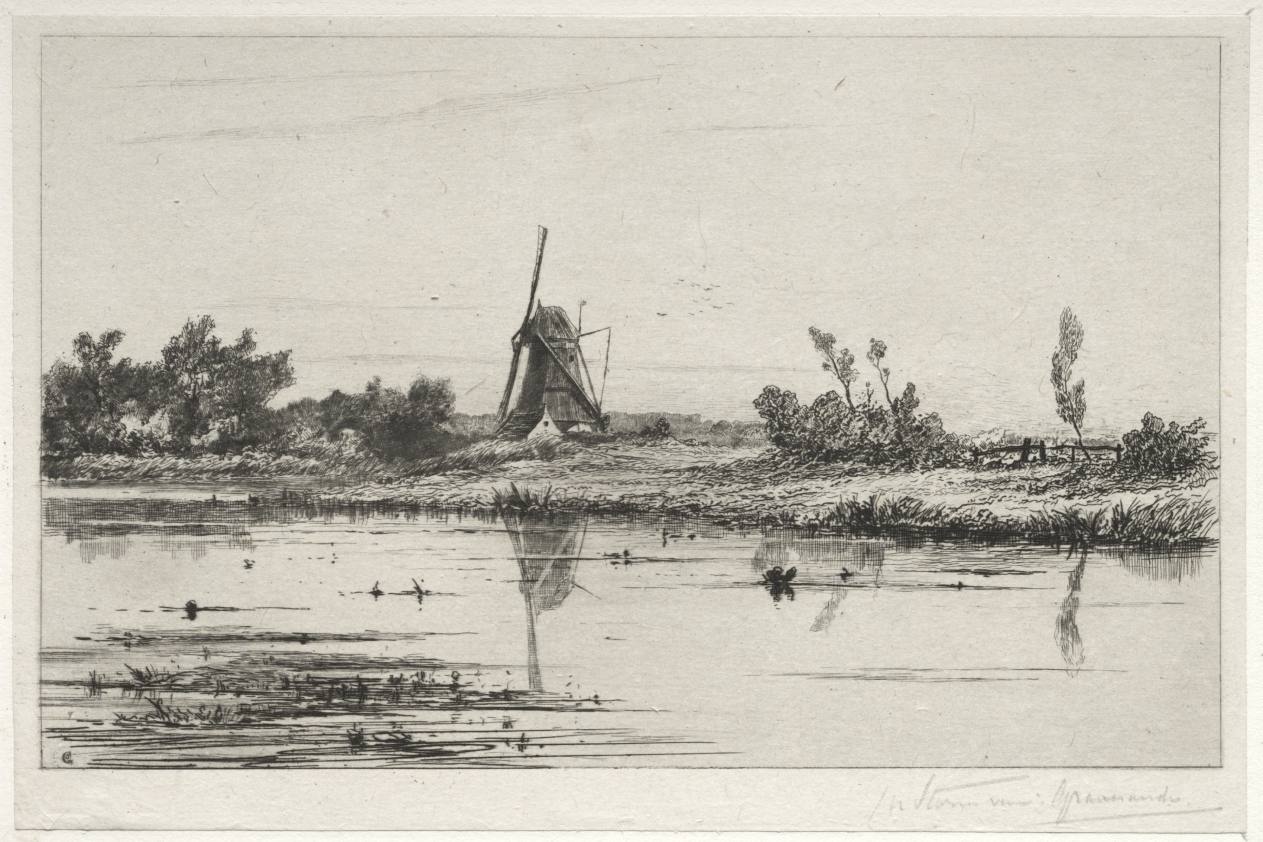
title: Le bord au Gein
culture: Netherlands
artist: Charles Nicolas Storm van 's-Gravesande (Dutch, 1841–1924)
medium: etching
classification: Print